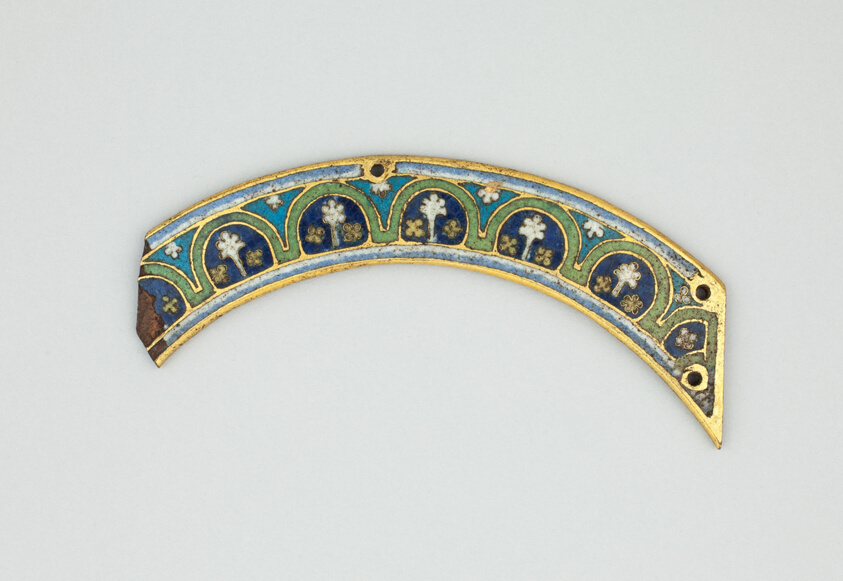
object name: Decorative Arts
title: Plaque from an Arch of a Reliquary Shrine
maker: German; Rhineland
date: 1175/1200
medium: Gilt copper, champlevé enamel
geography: Rhineland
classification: enamel; european decorative arts; decorative arts